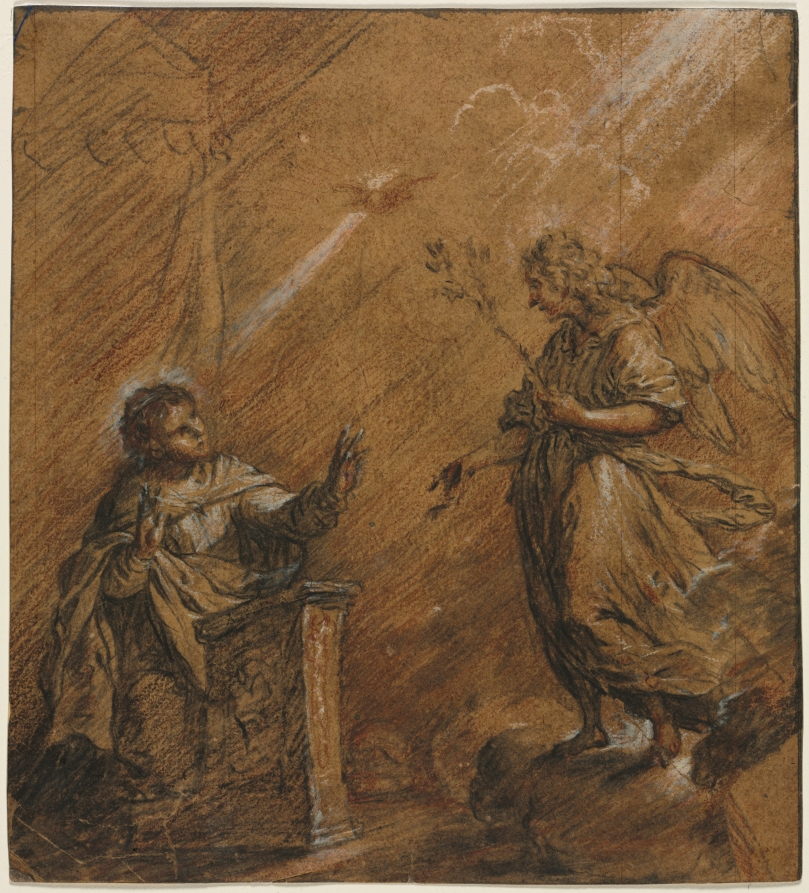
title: The Annunciation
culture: Germany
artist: Johann Jakob von Sandrart (German, 1655–1698)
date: last third 1600s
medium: black and red chalk with white gouache, framing lines in black chalk and black ink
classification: Drawing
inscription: [by artist?], on pris-dieu, in black ink: [illegible] ; VERSO (of primary or secondary support), in ink: [about 25 lines of script] ; VERSO OF TERTIARY SUPPORT, center, in graphite: 16 [partially erased] ; center, in graphite : 346 ; center, in graphite: No 110[L?] ; lower right, in graphite: [e/c?][circled] ; lower right, in red pencil: A ; lower right, in graphite: No 3059